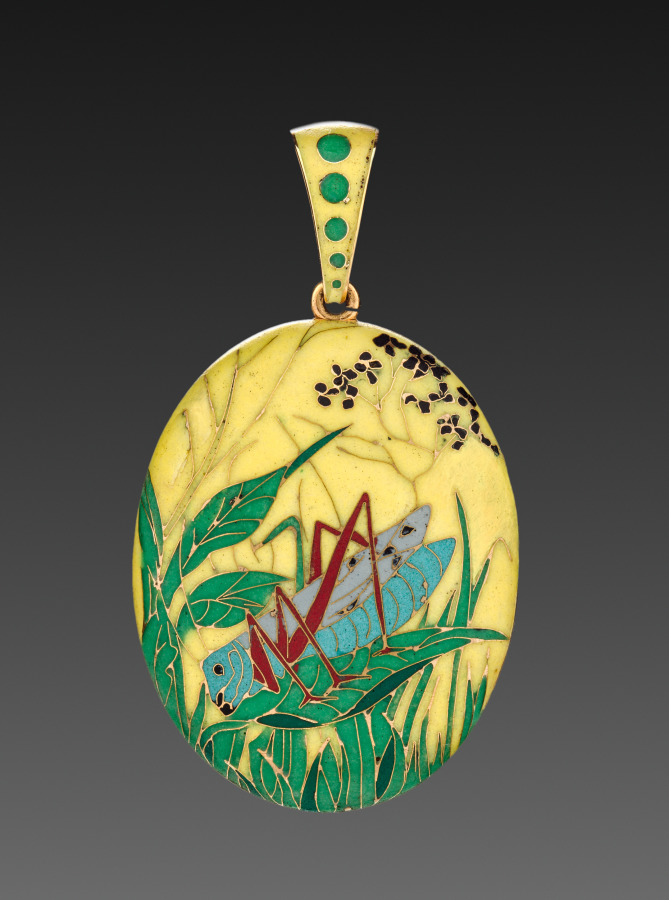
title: Locket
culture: France, 19th century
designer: Alexis Falize (French, 1811–1898)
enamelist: Antoine Tard (French, active 1860–1889)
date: 1868–70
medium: gold and cloisonné enamel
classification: Jewelry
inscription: inscribed inside original box: Tiffany + Co./550-Broadway-552/New York."